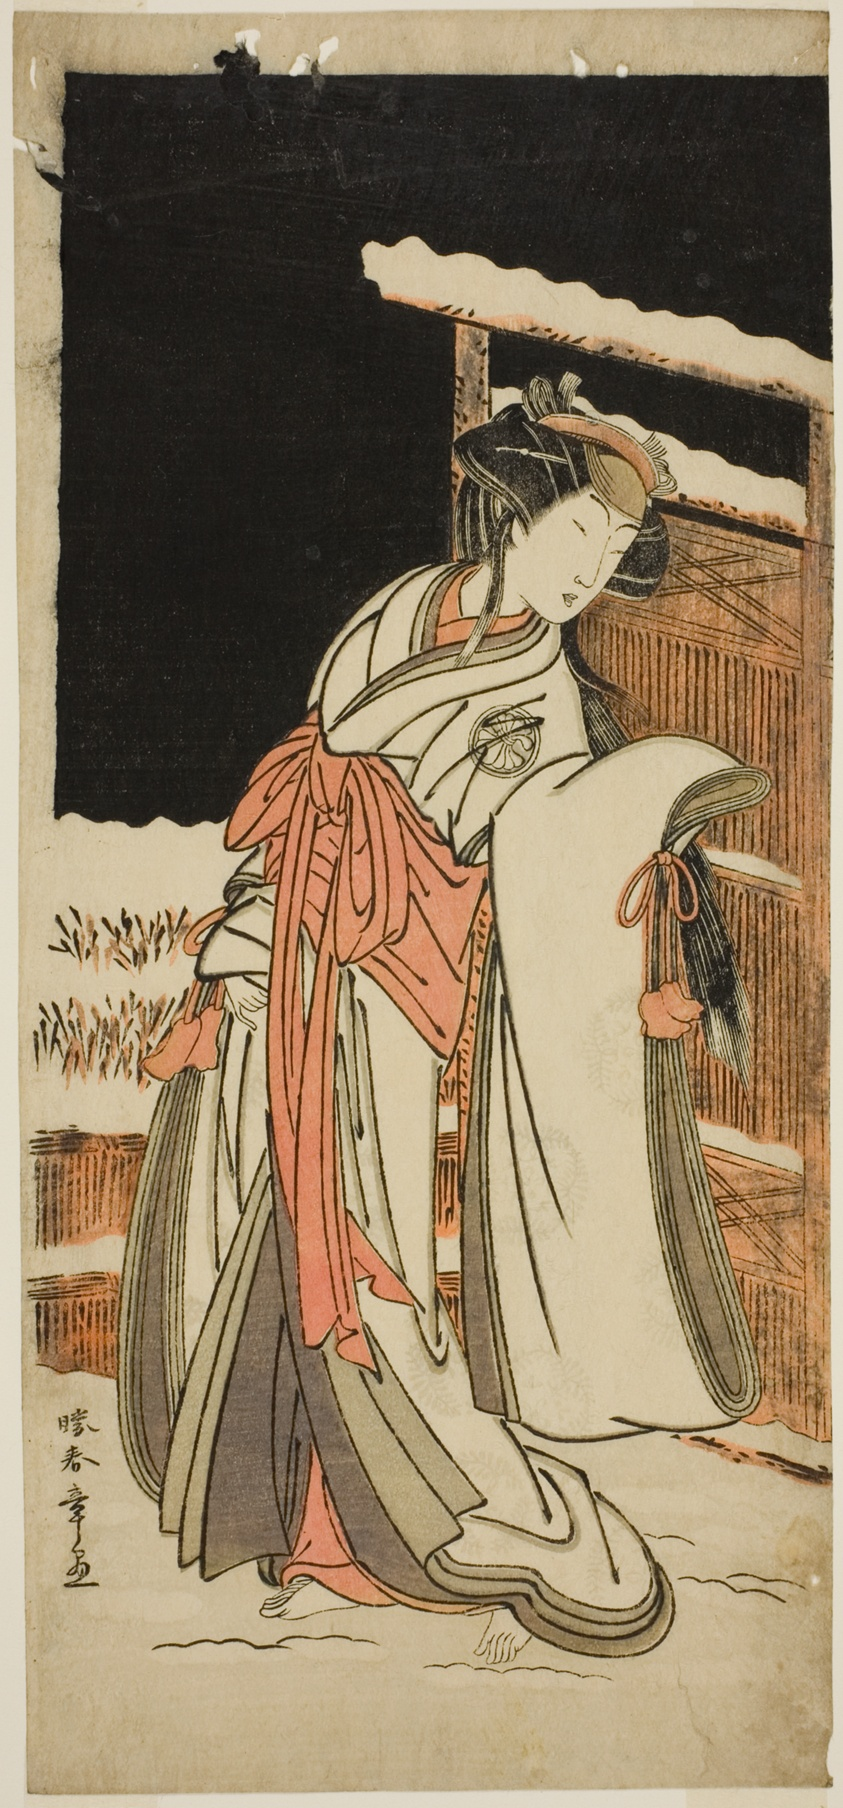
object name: Print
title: The Actor Segawa Kikunojo III as Lady Shizuka (Shizkua Gozen) Disguised as Tamazusa in the Play Chigo Torii Tobiiri Kitsune, Performed at the Ichimura Theater in the Eleventh Month, 1777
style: Japanese (culture or style)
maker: Katsukawa Shunsho 勝川 春章; Japanese, 1726-1792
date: c. 1777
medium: Color woodblock print; hosoban; from a multisheet composition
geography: Japan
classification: woodblock print; print; asian art